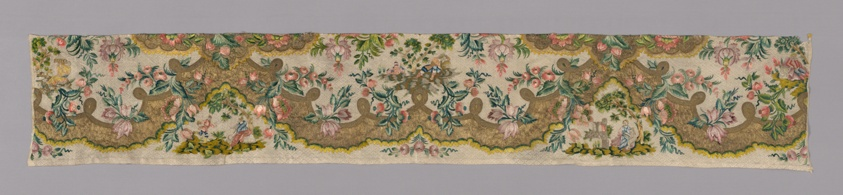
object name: Textile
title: Border of a Valance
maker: Spain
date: 18th century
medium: Embroidered silk floss on cream-white, silk damask with heavy scroll work of solid gold; embroidered in diaper stitch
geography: Spain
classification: textile; needlework (visual works)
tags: people